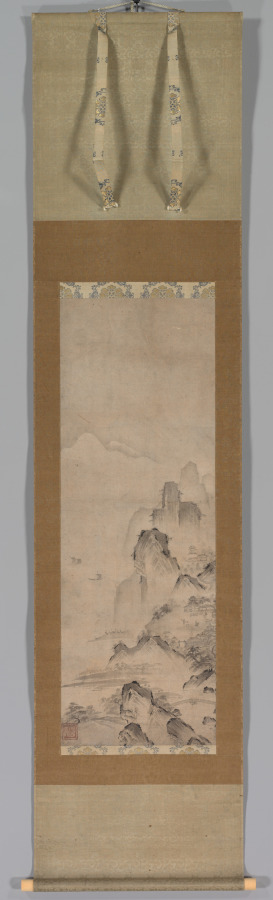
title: Landscape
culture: Japan, Muromachi period (1392–1573)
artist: Narihide (Japanese, active 1500s)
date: 1500s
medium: hanging scroll; ink on paper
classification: Painting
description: This composition includes imagery from the Eight Views of the Xiao and Xiang Rivers. Scanning the composition from top to bottom, at least six of the views are discernible: night rain over Xiao and Xiang, evening bell from a mist-shrouded temple, returning sails off a distant shore, geese descending to a sandbar, mountain village in clearing mist, and sunset glow over a fishing village. Inside the painting’s box is a document with a long inscription by prominent calligrapher, collector, and connoisseur Maeda Kōsetsu (1841–1916) discussing the painting’s subject and the matter of the painter’s biography—he appears to have been a Kano school artist, but his precise identity is unclear.